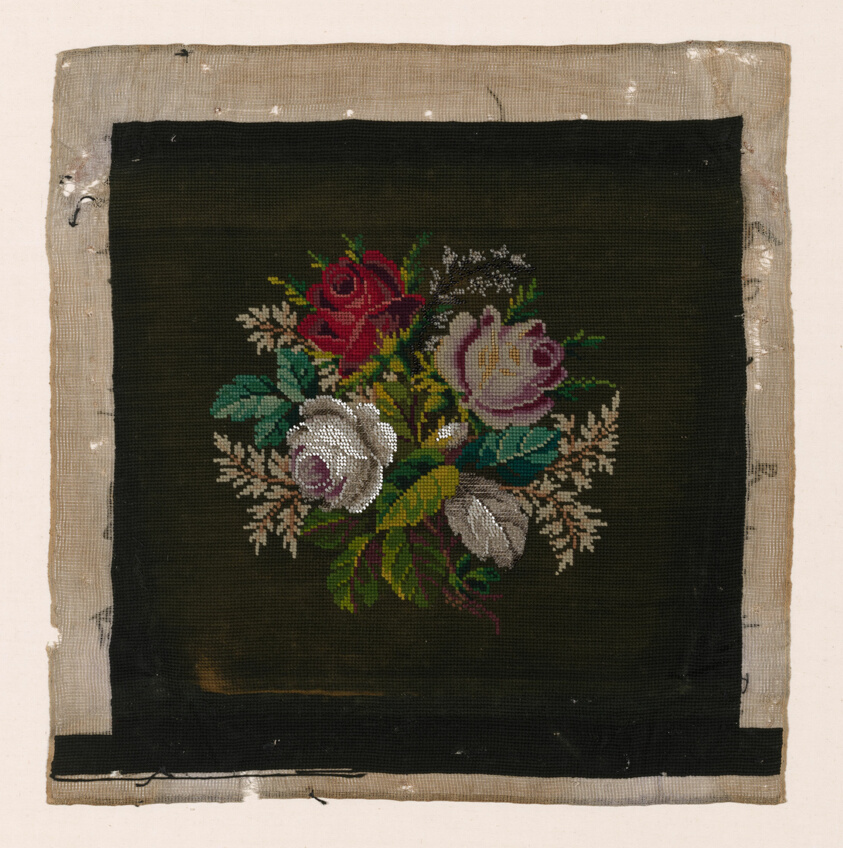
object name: Textile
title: Chair Seat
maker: England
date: c. 1880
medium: Cotton, plain weave; embroidered with wool, silk and cotton with glass beads in cross, half cross and tent stitches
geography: England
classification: textile; needlework (visual works)